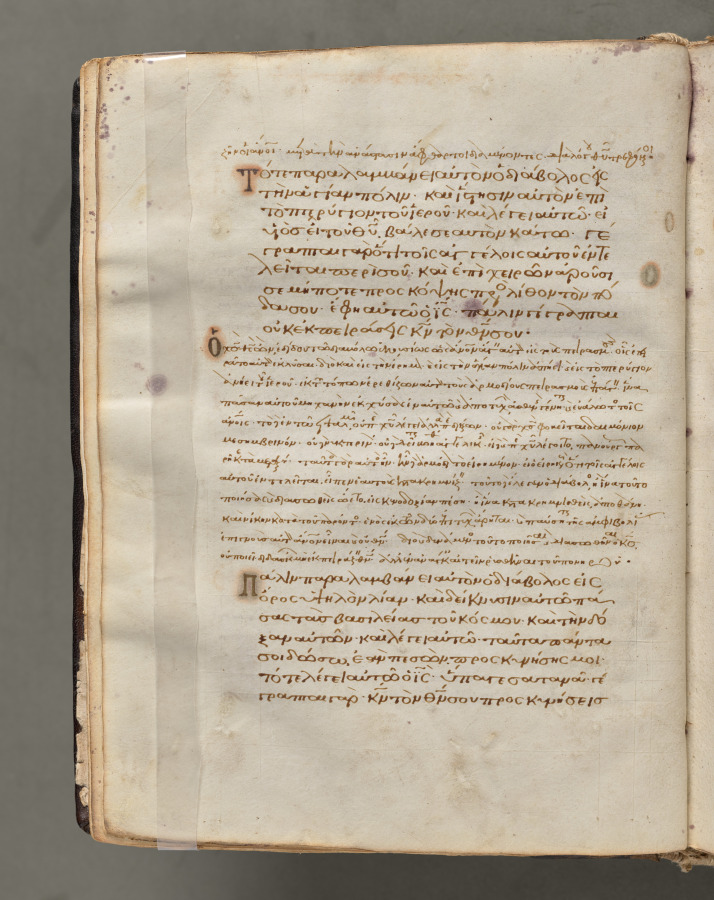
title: Text, folio 15 (verso), from a Gospel Book with Commentaries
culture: Byzantium, Constantinople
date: c. 1000–1100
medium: ink, tempera, and gold on vellum; leather binding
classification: Bound Volume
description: Each of the four gospels in this book opens on a page with brilliantly illuminated borders depicting the author of the text as well as birds-principally peacocks, symbols of the immortality of the soul-and fountains, representing the fountain of life and the salvation of the soul. This volume consists of 428 leaves with texts in Greek. Its level of sophistication suggests that it was probably written and decorated in a monastery in Constantinople.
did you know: Gospel Books were carried in procession through Byzantine churches.